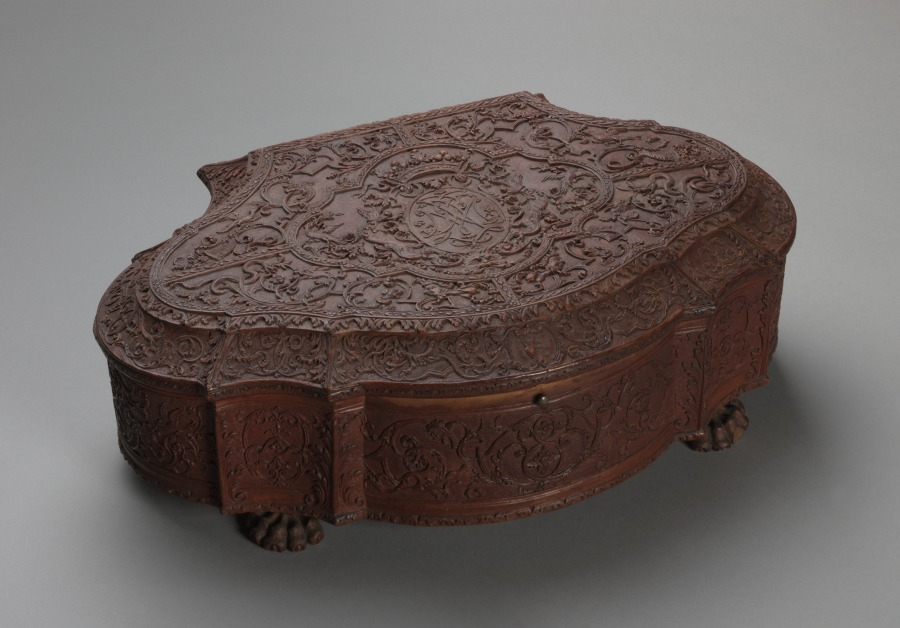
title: Pair of Boxes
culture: France, Nancy, early 18th century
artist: Bagard (French)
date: early 1700s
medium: wood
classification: Furniture and woodwork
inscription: on top of box, initials crowned by coronet